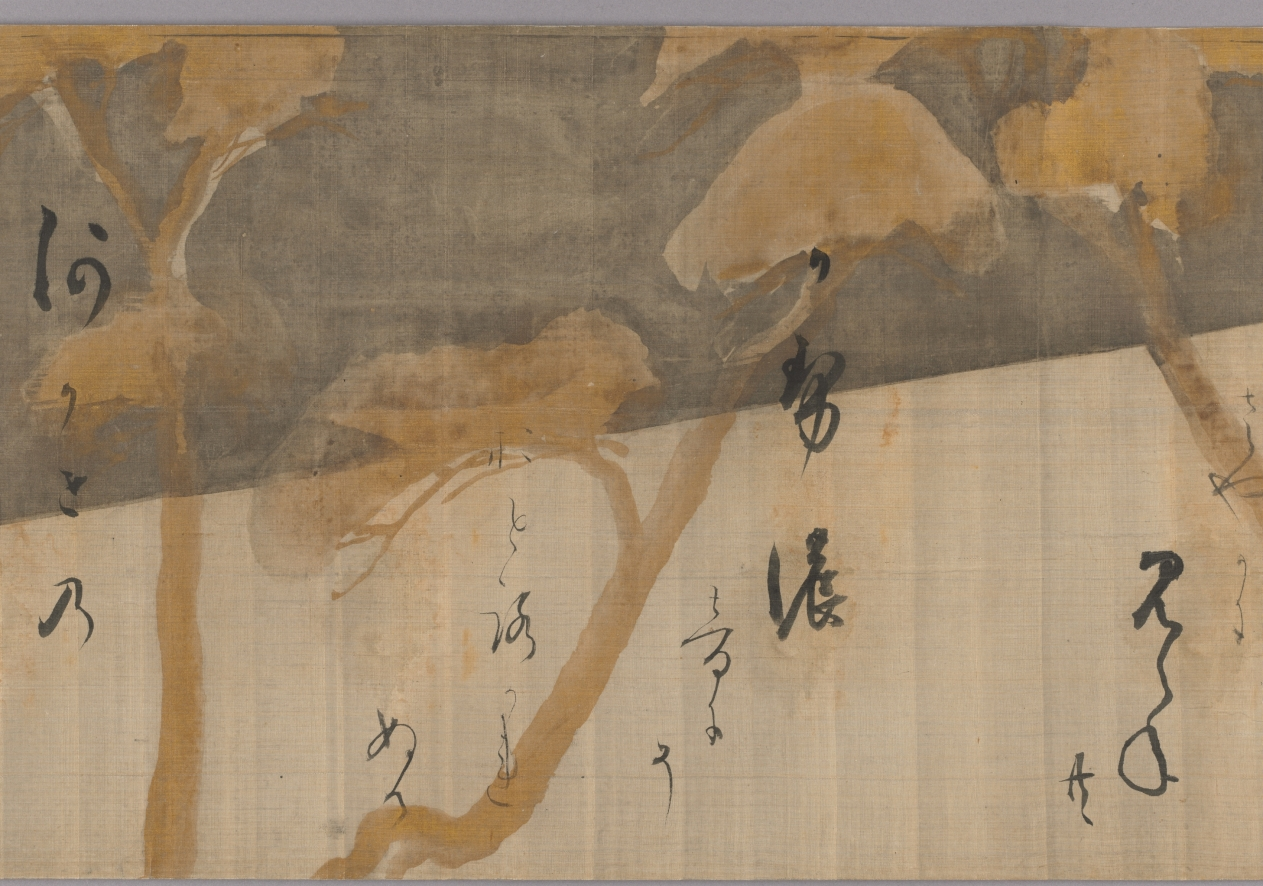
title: Selections from the Collection of Japanese Poems from Ancient and Modern Times (Kokin wakashū) with Design of Pines Along the Shore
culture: Japan, Momoyama period (1573-1615) to Edo period (1615-1858)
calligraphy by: Hon'ami Kōetsu (Japanese, 1558–1637)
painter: attributed to Tawaraya Sōtatsu (Japanese, c. 1570–c. 1640)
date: 1600s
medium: handscroll; ink on silk with gold and silver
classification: Calligraphy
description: The calligrapher and craftsman Hon’ami Kōetsu frequently collaborated with Tawaraya Sōtatsu, a painter who ran a studio that produced fans and screens. Sōtatsu’s work featured abstracted and flattened shapes, fields of color and gold, and asymmetry. In particular, motifs that appeared in small scale, such as flora and fauna, in early decorated Japanese papers were painted in a larger scale—blown up as if seen under a magnifying glass. For this handscroll, Kōetsu brushed poems from the autumn section of a poetry anthology onto silk with a landscape of pines in gold and silver likely painted by Sōtatsu.